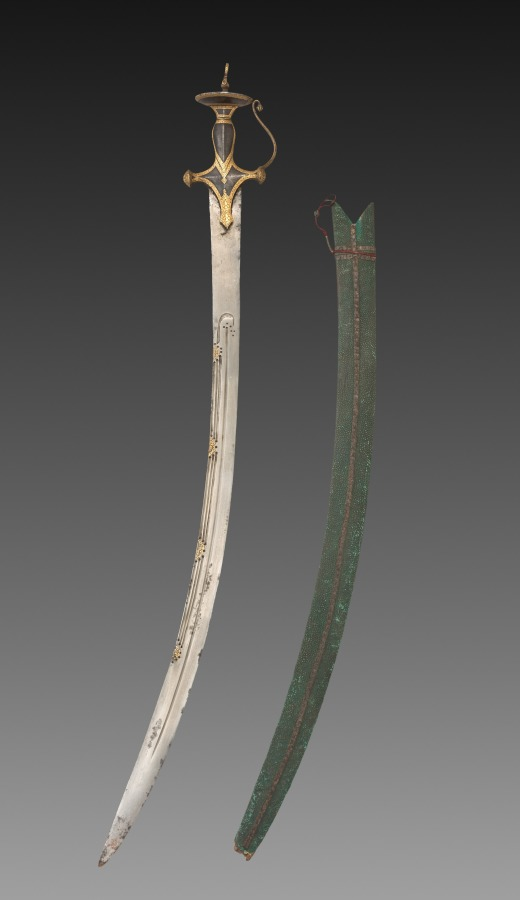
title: Silapa Sword with Green Leather Case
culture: India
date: 1700s–1800s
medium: gold with inlay and leather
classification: Arms and Armor